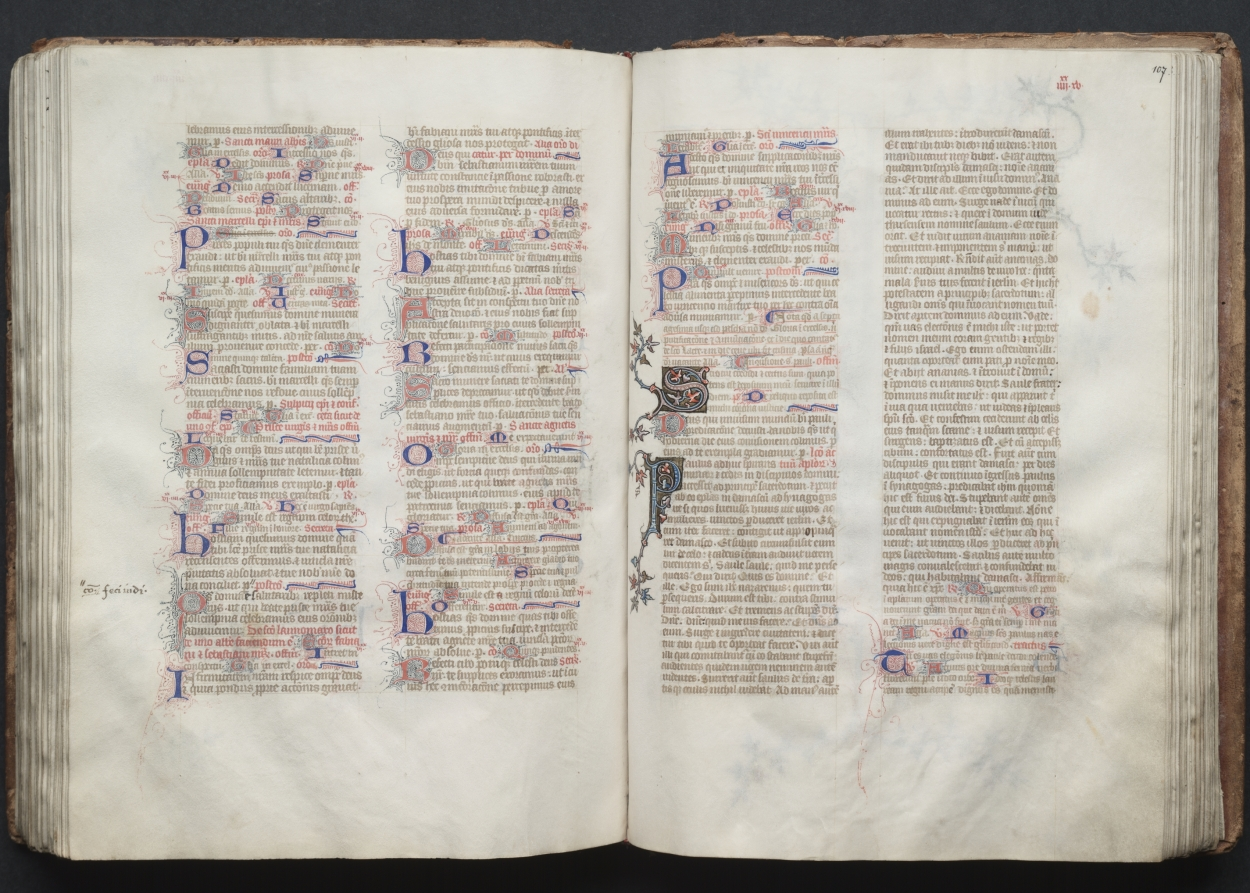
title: The Gotha Missal: Fol. 107r, Text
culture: France, Paris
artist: Master of the Boqueteaux (French)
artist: and Workshop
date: c. 1375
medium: ink, tempera, and gold on vellum; blind-tooled leather binding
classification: Bound Volume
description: The style and quality of this manuscript's decoration is typical of deluxe Parisian books made for aristocratic or royal patrons. Most of the book's decoration appears to be the work of the Master of the Boqueteaux, an artist active at the court of King Charles V (died 1380). His style was apparently shared by a number of book illuminators working in and around Paris. It is very possible that the Gotha Missal belonged to Charles V, but is not provable because the manuscript has no royal portraits and lacks a colophon. Given the book's magnificent decoration, however, it would seem that it was produced for a Valois prince, if not for the king himself. The manuscript receives its name from the German dukes of Gotha, its later owners.